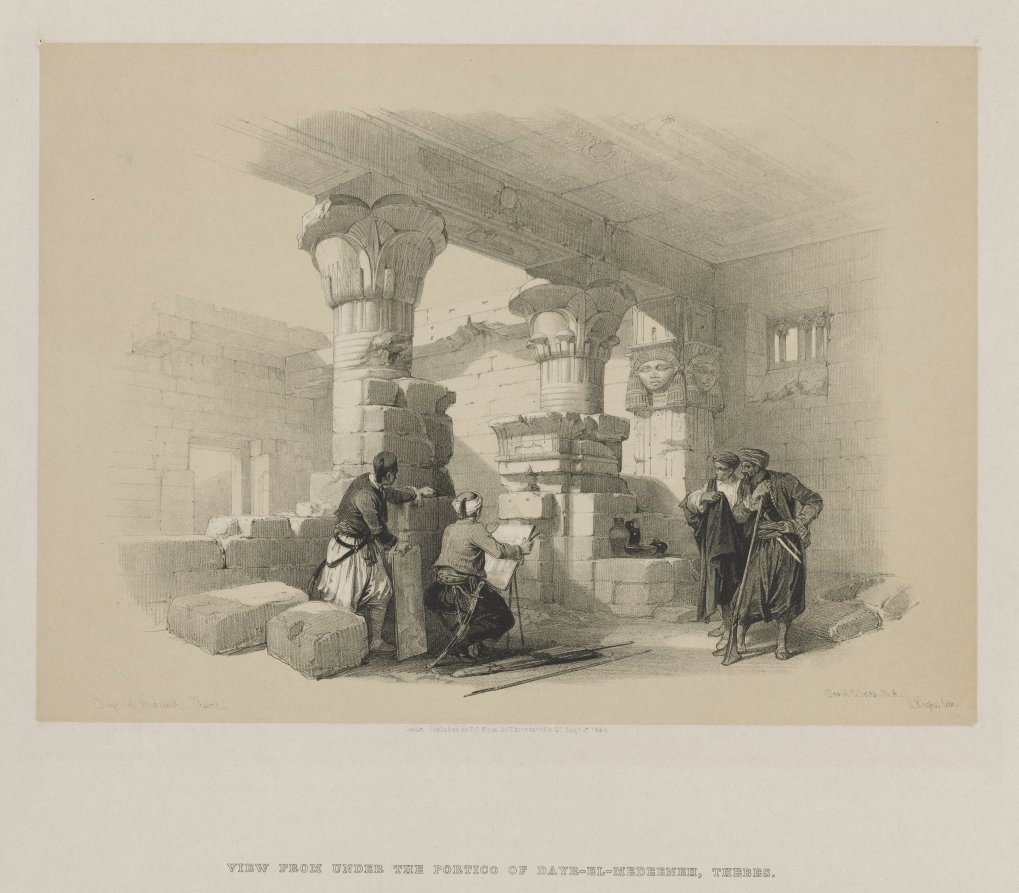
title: Egypt and Nubia, Volume II: Dayr-El-Medeeneh, Thebes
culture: England, 19th century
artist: Louis Haghe (British, 1806–1885)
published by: F. G. Moon, 20 Threadneedle Street, London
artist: after David Roberts (Scottish, 1796–1864)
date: 1848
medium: color lithograph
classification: Print